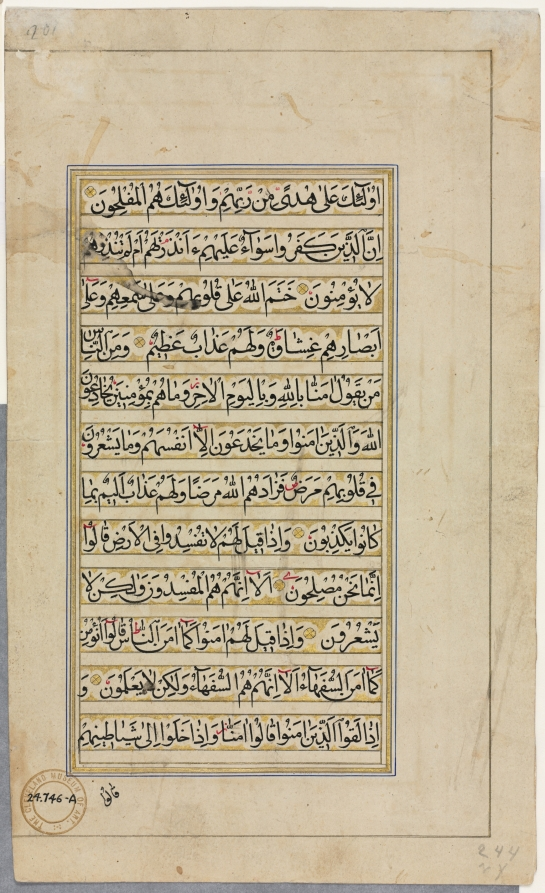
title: Qur'an Manuscript Folio (verso); Text Page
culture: Afghanistan, Herat, Safavid period (1501–1722)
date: 1500s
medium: ink, gold, and colors on paper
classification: Manuscript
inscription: Translation: Surah I: 1-7: In the Name of God, the Merciful, the Compassionate. Praise belongs to God, the Lord of all Being, the All merciful, the All-compassionate, the Master of the Day of Doom Thee only do we serve; to Thee alone do we pray for succour. Guide us in the straight path, the path of those whom Thou has blessed, not of those against whom Thou art wrathful, nor of those who are astray. Left folio (Surah II, 1-4) In the Name of God, the Merciful, the Compassionate. Alif Lam Mim That is the book, wherein is no doubt, a guidance to the godfearing who believe in the Unseen, and perform the prayer, and expend of that We have provided them; who believe in what has been sent down to thee and that had been sent down before thee, and have faith in the Hereafter; those are upon guidance from their Lord, those are the ones who prosper. Sura al-Baqara [Chapter:The Cow] 2:5-part 14 (Arabic) Script: Naskhi (twelve lines to a page) Written in a very tiny hand, in the center of the white border that surrounds the lower rectangle, is the signature of the illuminator. The inscription is damaged, so that the name is illegible. Ir reads: amala [illegible] al-muzahib (the work of [illegible] the illuminator).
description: The Qur'an is the sacred book of Islam. In the view of orthodox Muslims, it is the literal word of God as revealed to the Prophet Muhammad (d. 632) in the Arabic language, and thus, recorded in the Arabic script. Because of its association with the divine word, Arabic calligraphy came to be a supreme art form in the Islamic world. As the quintessential symbol of the culture, it became a pervasive decorative element in Islamic art and architecture. Although secondary to calligraphy, a tradition of illumination—that is, ornamentation with colors and gold—developed to enhance the pages of the Qur'an. Because of the prestige associated with the book arts in the Islamic world, the decorative motifs employed by illuminators (scrolling vines, blossoms, lozenges, and cartouches) found their way into other art forms, for example, metalwork, textiles, and carpets.